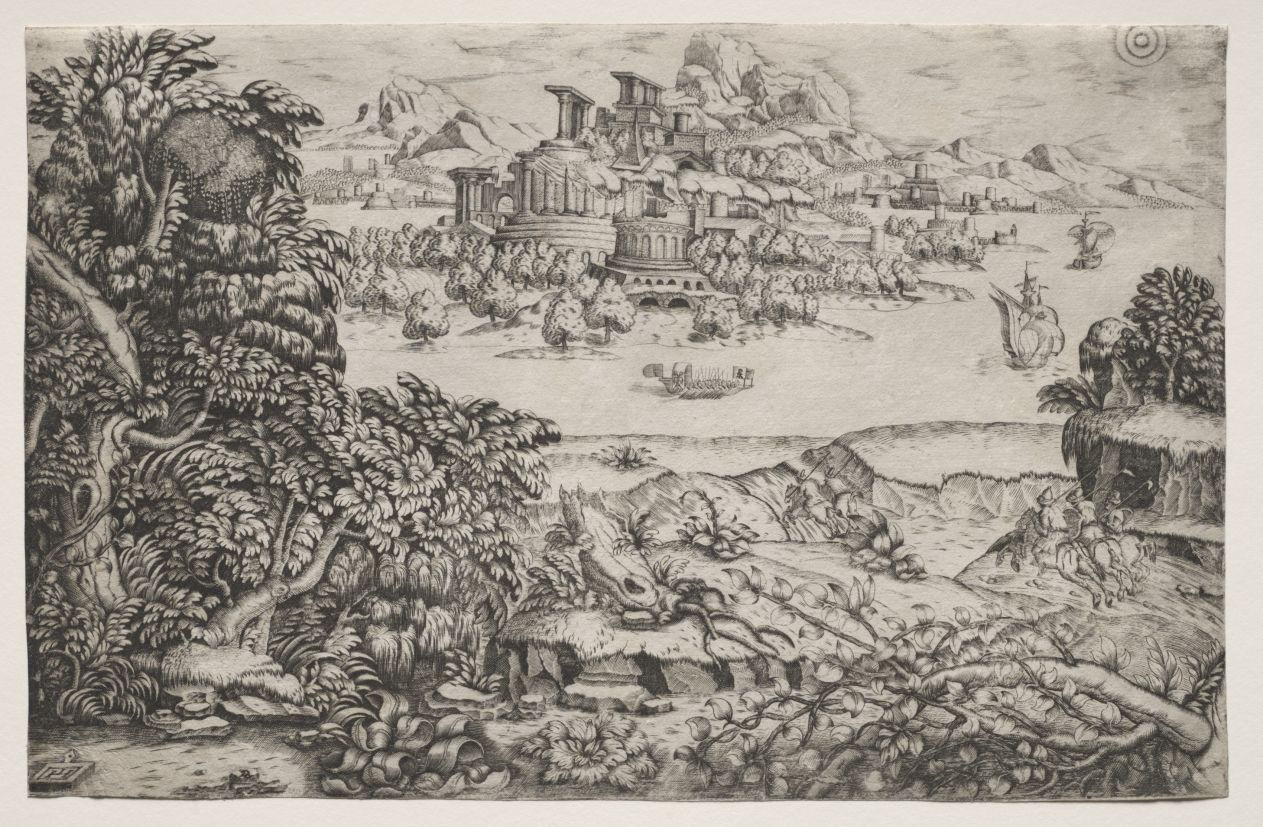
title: Landscape with a Temple above a Lake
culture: Italy, 16th century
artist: Monogrammist HI (Italian)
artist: and Monogrammist DB (Italian)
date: 16th century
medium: engraving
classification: Print